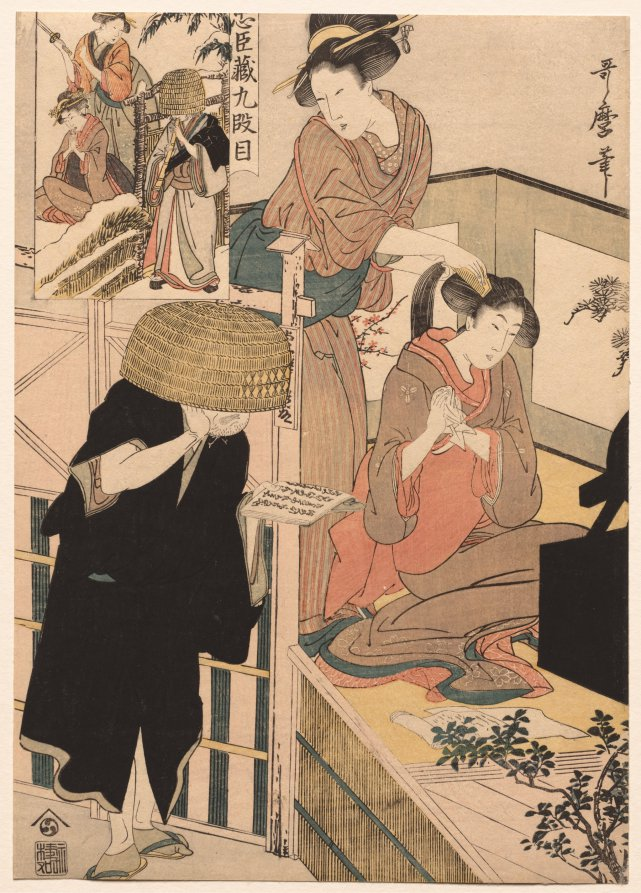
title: Chushingura: Act IX of The Storehouse of Loyalty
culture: Japan, Edo period (1615–1868)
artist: Kitagawa Utamaro (Japanese, c. 1754–1806)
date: late 1790s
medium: color woodblock print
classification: Print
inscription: Aritst's signature: Utamaro hitsu.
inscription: Publisher: Nishimuraya Yohachi (Eiju han, emblem).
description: Stage version: In this dramatic scene depicted in Masayoshi’s stage version (see Chushingura: Perspective Picture for the "Treasure House of Loyalty" [1985.338.9]), Tonase prepares to kill her daughter Tonami with her husband’s sword and then to commit suicide. The dire moment results from the humiliating rejection of her daughter’s marriage contract. Fortunately, her husband, Honzo, dressed as an itinerant Buddhist priest, appears just in time to stop the tragedy. Parody print: In the parody print, Utamaro turned this dramatic event into a scene of domesticity in which the mother brushes her daughter’s hair. An itinerant priest, wearing a deep-brimmed basket hat, reads to them from the gate.